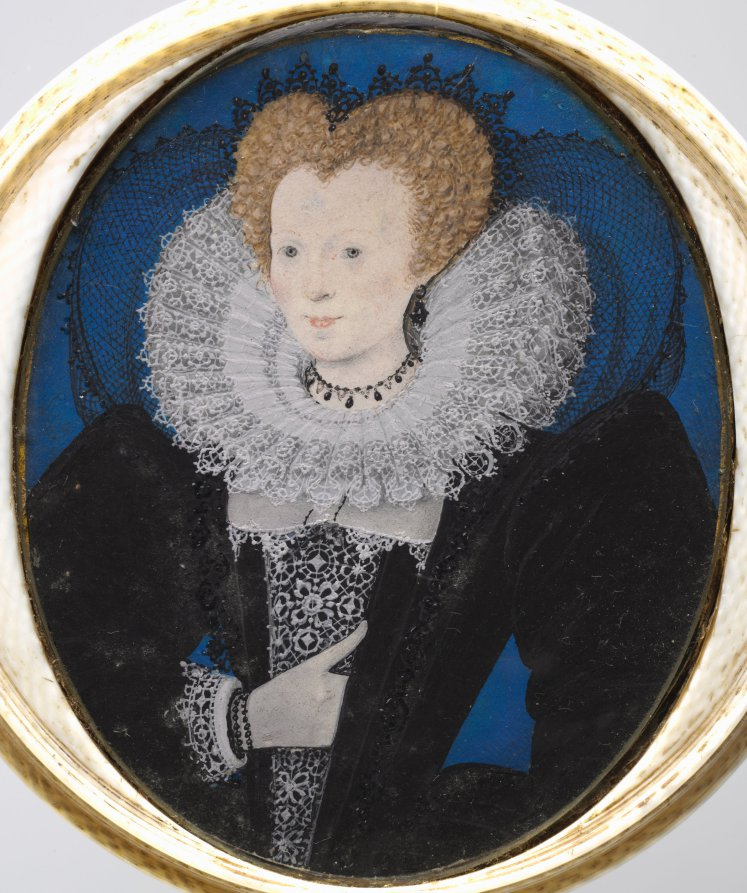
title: Portrait of a Woman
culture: England, 16th century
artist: studio of Nicholas Hilliard (English, c. 1547–1619)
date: 1590s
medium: watercolor on vellum in original turned ivory case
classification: Portrait Miniature